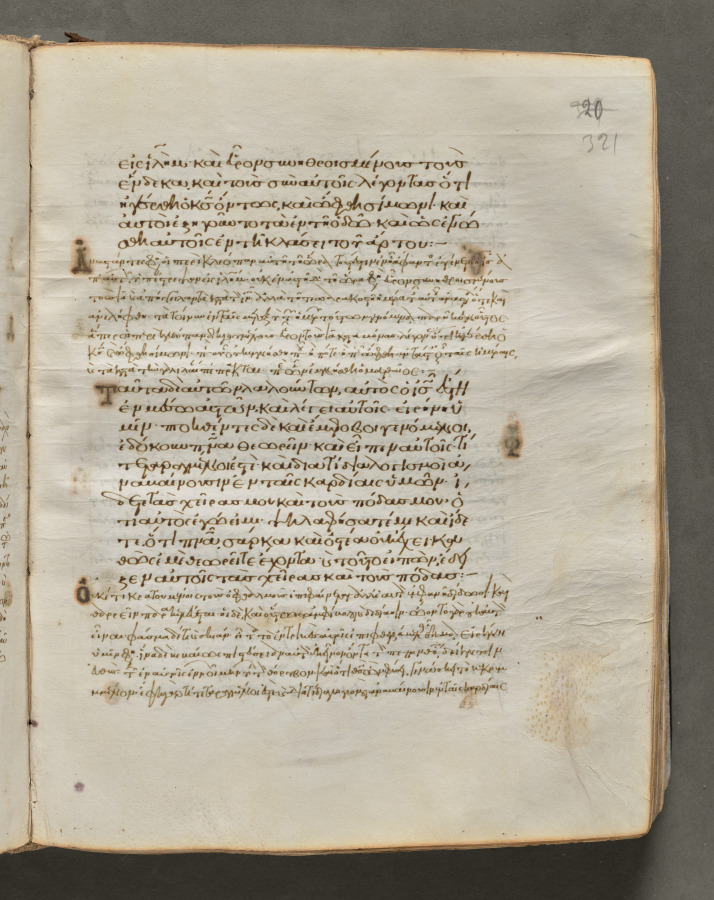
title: Text, folio 321 (recto), from a Gospel Book with Commentaries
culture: Byzantium, Constantinople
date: c. 1000–1100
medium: ink, tempera, and gold on vellum; leather binding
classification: Bound Volume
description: Each of the four gospels in this book opens on a page with brilliantly illuminated borders depicting the author of the text as well as birds—principally peacocks, symbols of the immortality of the soul—and fountains, representing the fountain of life and the salvation of the soul. This volume consists of 428 leaves with texts in Greek. Its level of sophistication suggests that it was probably written and decorated in a monastery in Constantinople.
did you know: Gospel books were carried in procession through Byzantine churches.